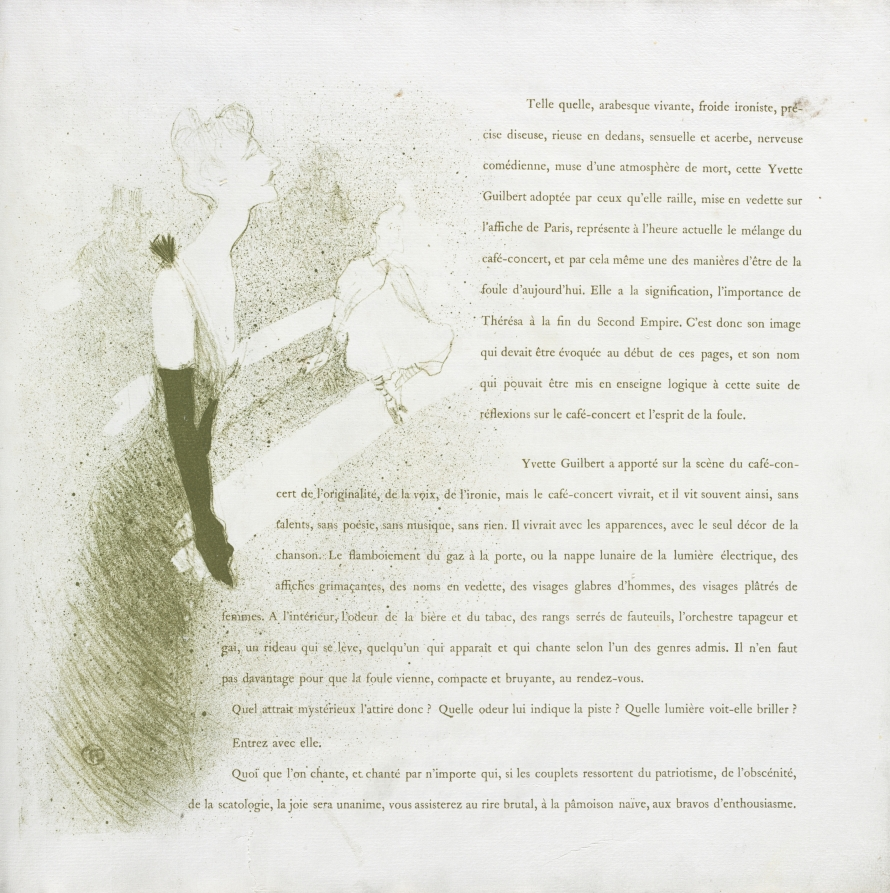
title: Yvette Guilbert-French Series: No. 2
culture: France, 19th century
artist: Henri de Toulouse-Lautrec (French, 1864–1901)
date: 1894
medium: lithograph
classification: Bound Volume